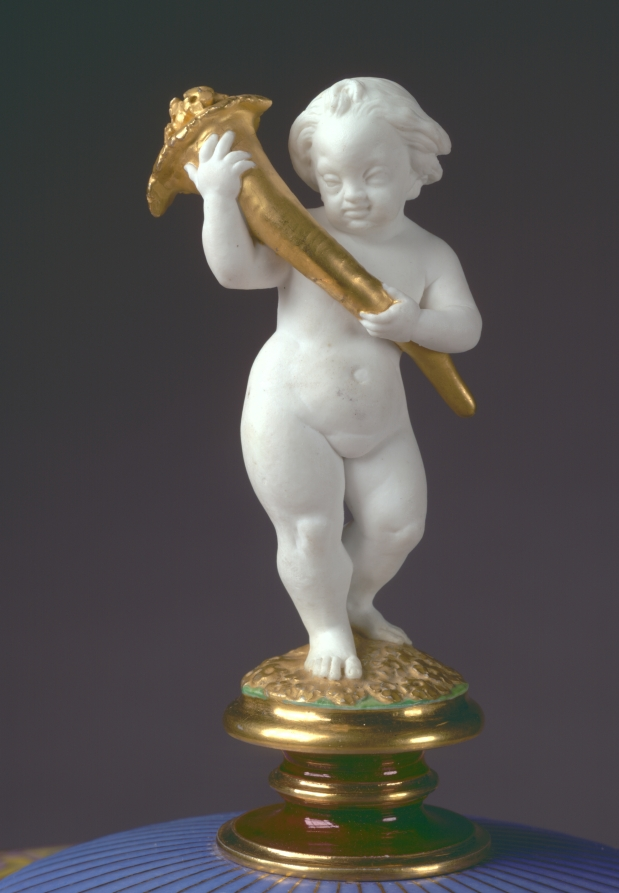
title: Standing Cup and Cover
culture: France, Sèvres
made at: Sèvres Porcelain Factory (French, est. 1756)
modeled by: Hyacinthe-Jean Regnier (French, 1803–1870)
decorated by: Francois-Hubert Barbin (French, 1786-)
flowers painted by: Jacques-Nicolas Sinsson (French)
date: 1844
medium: porcelain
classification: Ceramic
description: The official French porcelain factory at Sèvres has always been one of Europe's most important ceramic manufacturers, famous for its decorative pieces as well as more utilitarian wares. This vase in the Renaissance style, its design inspired by 16th-century French examples, is clearly in the tradition of elaborately conceived and decorated pieces intended for use by the French court or as presentation pieces by its monarchs. The latter was the fate of this Covered Cup, acquired in 1846 by Queen Marie-Amélie d'Orleans, the wife of Louis-Philippe, king during the July Monarchy (1830-48). Soon thereafter the vase was presented to a now unknown person. It is one of four pieces of this design made at the Sèvres factory, and the only one known today to have survived.